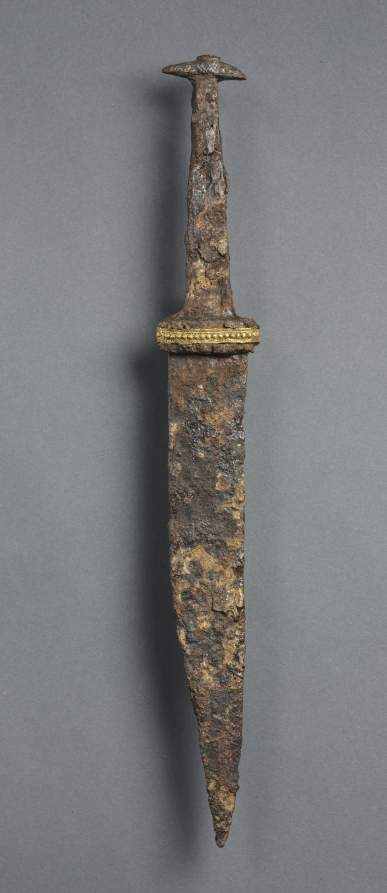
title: Single-Edged Knife (Scramasax)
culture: Frankish, Burgundy (?), Migration period, 7th century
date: 600s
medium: iron, copper, and gold foil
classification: Arms and Armor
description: The scramasax, a single-edged knife, was a general purpose implement. It could serve equally well as a tool or as a weapon and generally did not exceed 12 inches in length. As with most objects of the Migration period, iron weapons survive as excavated grave goods and tend to be heavily corroded. The grips, now missing, were probably fashioned from wood or bone and silver inlay decorated the pommels (the knob on the hilt, or handle). The ornamental gold foil bands, perhaps from the original scabbards (the cases in which the blades of swords or daggers are kept) have survived relatively intact.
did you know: Scramasax come in a variety of sizes and are all-purpose tools and weapons often carried by both men and women.